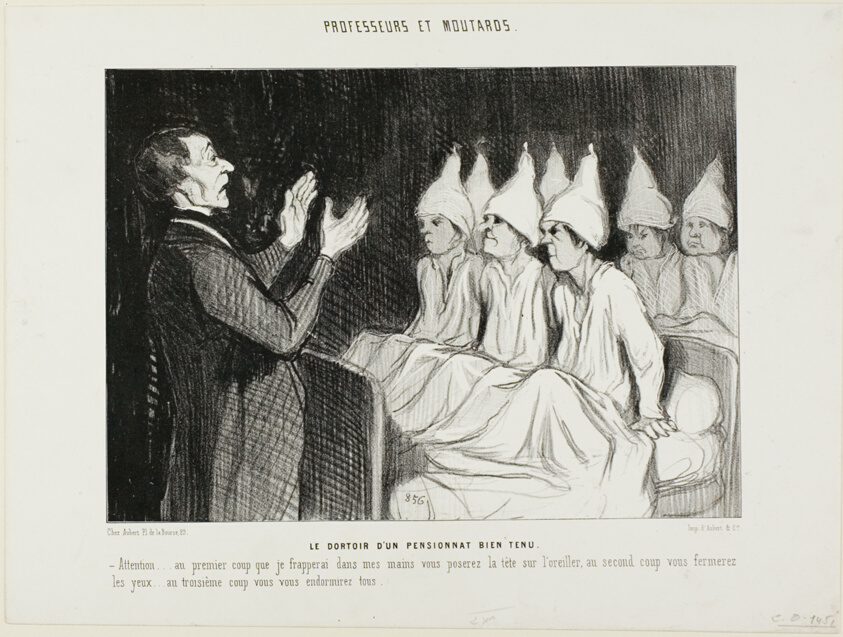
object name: Print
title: The Dormitory of a Distinguished Boarding School, plate 14 from Professeurs et Moutards (Professors and Rascals)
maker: Honoré Victorin Daumier; French, 1808-1879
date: 1846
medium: Lithograph in black on white wove paper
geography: France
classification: lithograph; print; prints and drawing